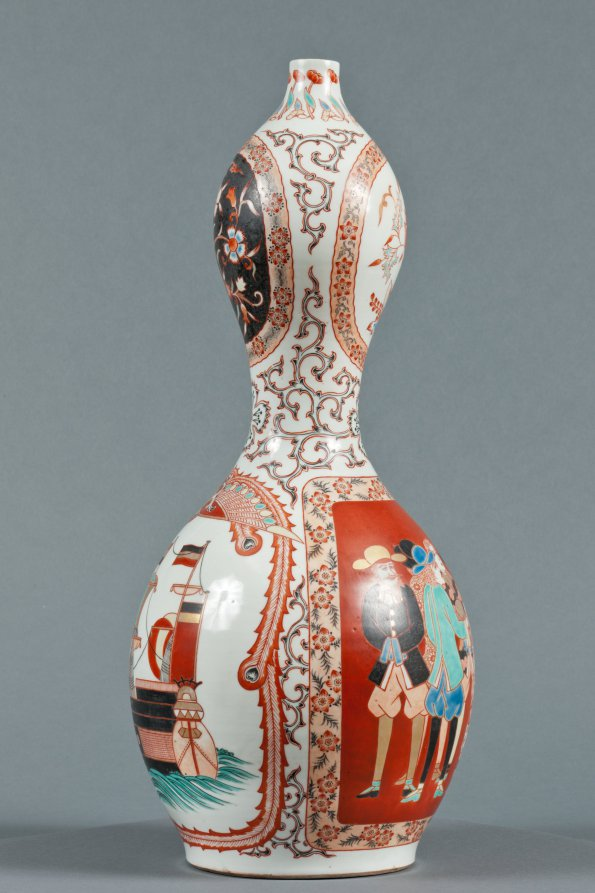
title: Bottle with Western Ships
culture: Japan, Edo period (1615–1868)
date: c. 1800–1868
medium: Porcelain with decoration in colored enamels and underglaze blue, overglaze enamels, and gold (Hizen ware, Arita type)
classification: Ceramic